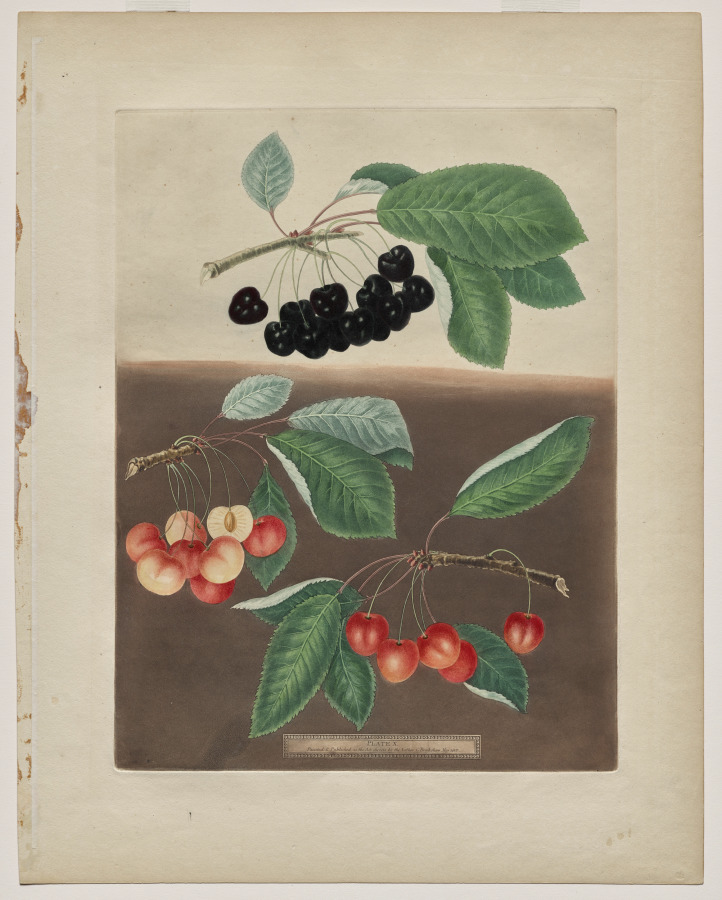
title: Pomona Britannica: No. 10 - Cherries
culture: England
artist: George Brookshaw (British, 1751–1823)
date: 1805, published 1812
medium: aquatint and stipple engraving printed in color and hand colored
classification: Print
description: This color aquatint etching is one plate from George Brookshaw’s 1812 illustrated volume Pomona Britannica. Named after the Roman goddess of fruit trees, gardens, and orchards, Brookshaw intended the volume to be the English “country gentleman’s” guide to the science of classifying and identifying fruits (pomology). Many of Brookshaw’s models came from the Royal Gardens at Hampton Court and Kensington Gardens. Each print featured one fruit, often life-size, including detailed depictions of its flower and leaves. Printed in color with hand-painted highlights, this and other illustrated botanicals formed an essential part of the cultured English library in the early 19th century.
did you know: King Henry VIII of England (r. 1508-47) ordered cherries be introduced to England after tasting them on the continent.